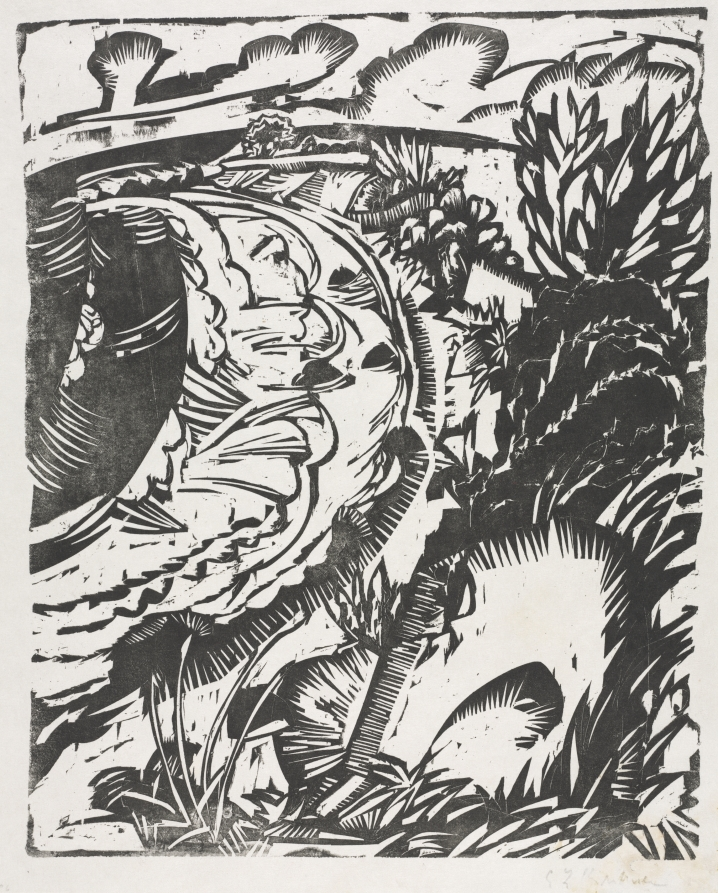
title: Dune Landscape with a Curving Bay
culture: Germany, 20th century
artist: Ernst Ludwig Kirchner (German, 1880–1938)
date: 1913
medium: woodcut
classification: Print